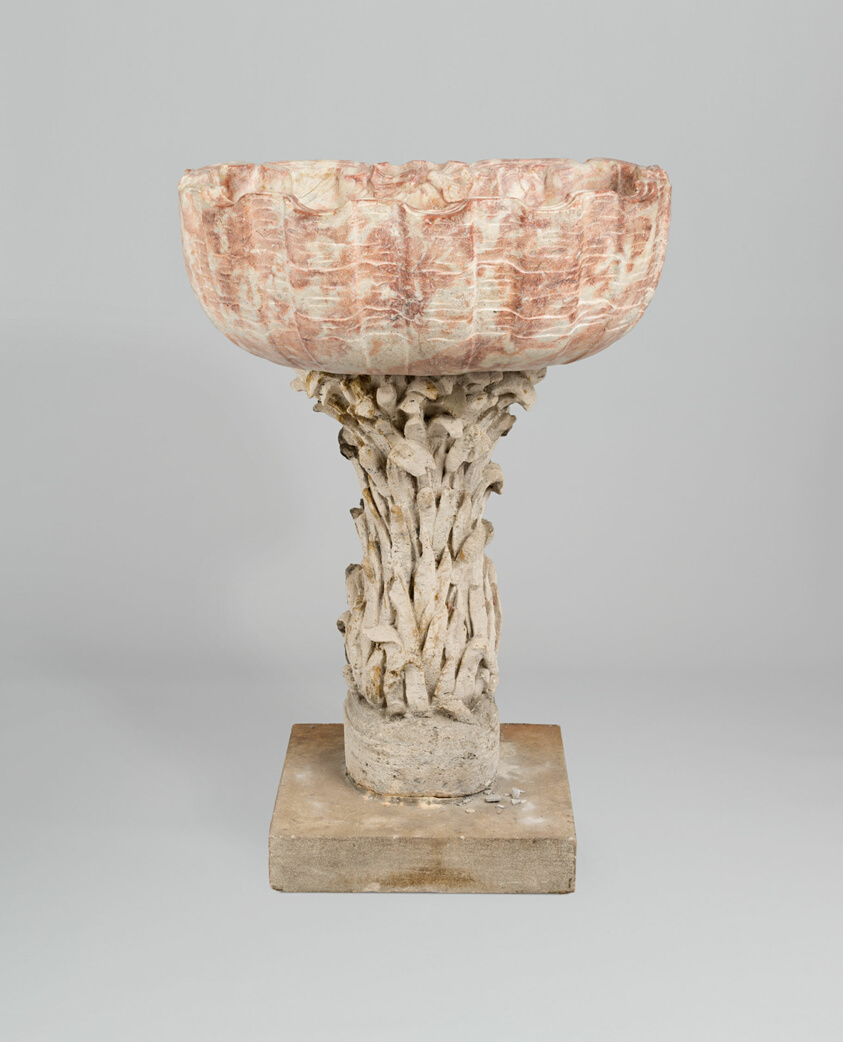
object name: Furniture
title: Fountain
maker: Europe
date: Mid to late 18th century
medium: Marble, sandstone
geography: Europe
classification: functional object; sculpture; furniture